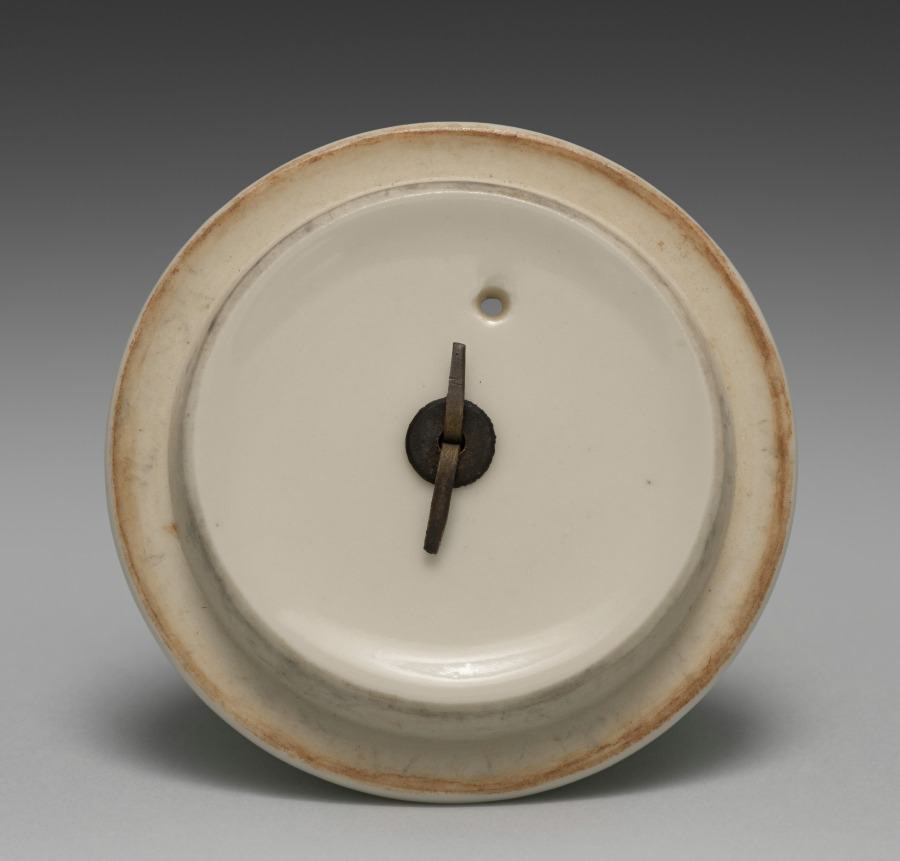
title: Lid for a Teapot with Ruyi Motifs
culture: Japan, Meiji period (1868–1912)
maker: Seifū Yohei III (Japanese, 1851–1914)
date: 1893–1914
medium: Porcelain with molded design and iron handles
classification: Ceramic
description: The simple, round form of this teapot is embellished with only a pair of nyoi staff-head motifs, one on each side. Two arched iron handles, parallel to each other, are hooked through holes in raised tabs at the front and back of the shoulders of the pot. The round lid is depressed so that an iron ring handle fastened with an iron clamp passing through the lid can lie flat inside the recessed area. The box is not original to the piece and has an inscription dated to 1960. The person who wrote it clearly admired Yohei III and his efforts to produce works that resembled Chinese ceramics. The inscription describes Yohei’s journey to perfecting these copies but misidentified the Chinese kiln whose wares were the basis for this particular work.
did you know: The base of the pot has a “Seifu” seal.